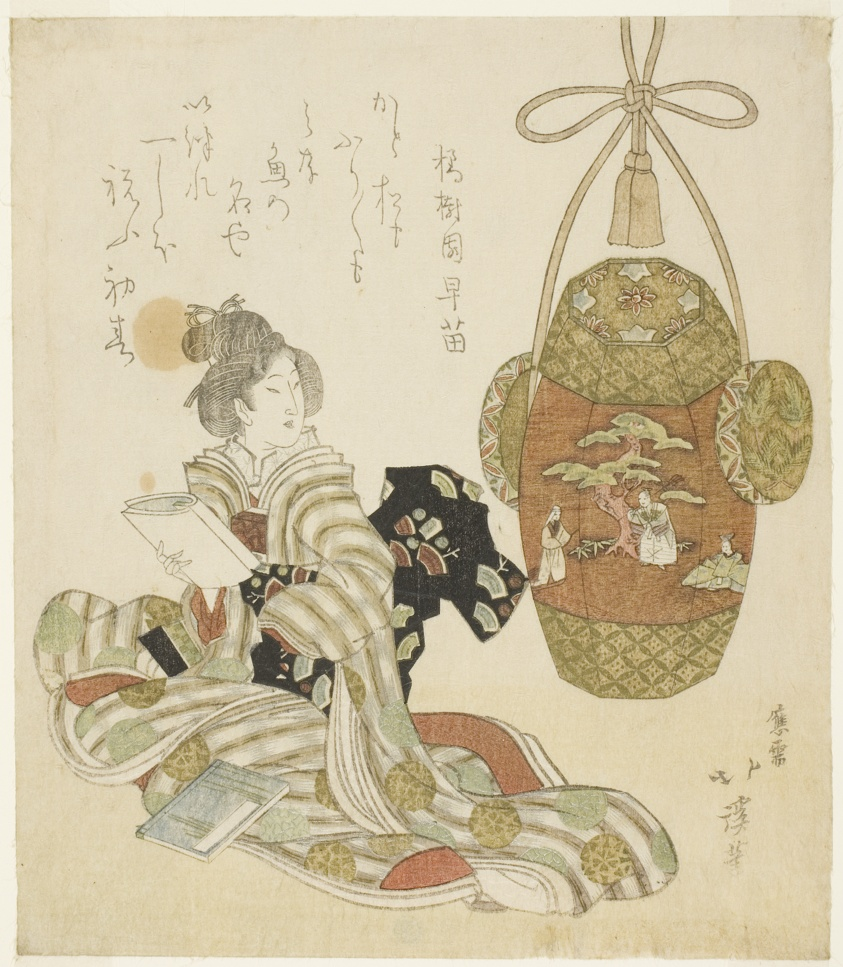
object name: Print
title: Woman with book sitting next to a New Year pull toy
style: Japanese (culture or style)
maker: Totoya Hokkei (Japanese, 1780-1850)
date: late 1810s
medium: Color woodblock print; shikishiban, surimono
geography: Japan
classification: woodblock print; print; asian art